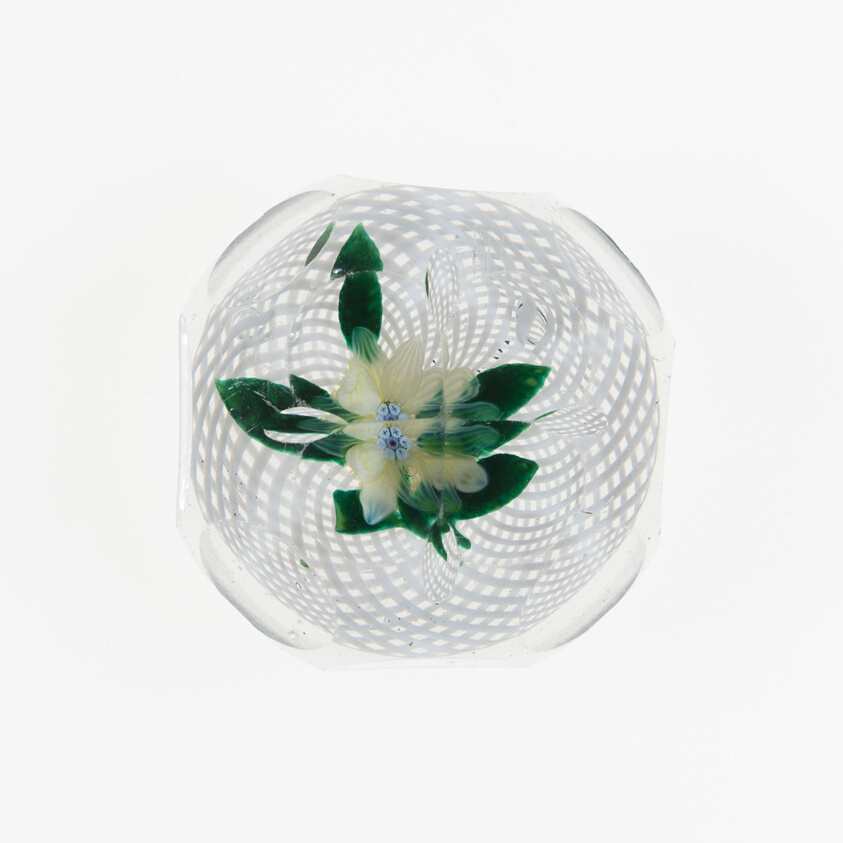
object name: Glass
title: Paperweight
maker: New England Glass Company (Cambridge, Massachusetts, 1818-1888)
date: Late 19th century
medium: Glass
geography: United States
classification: paperweight; glass